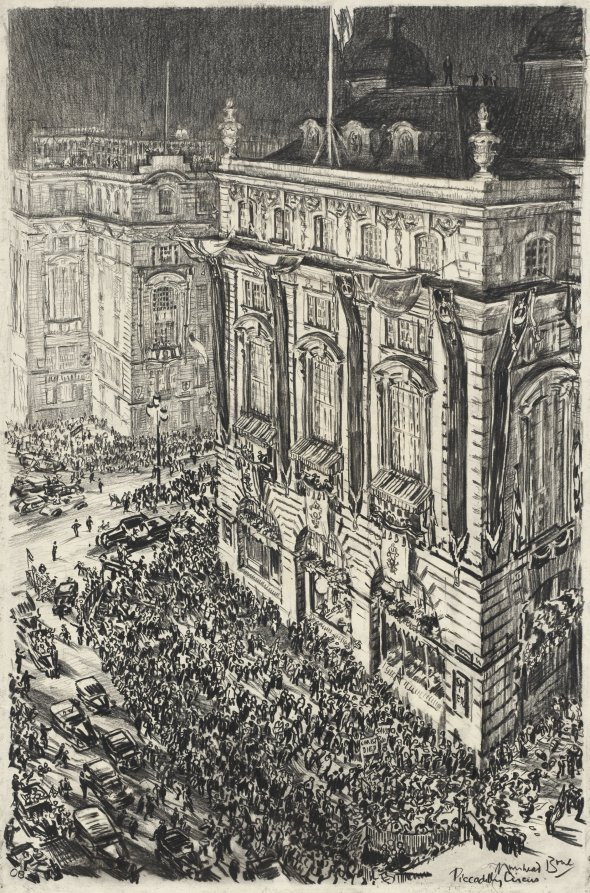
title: Piccadilly Circus, Eve of the Coronation of George VI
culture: England, 20th century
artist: Muirhead Bone (British, 1876–1953)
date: 1937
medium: conté crayon and graphite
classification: Drawing